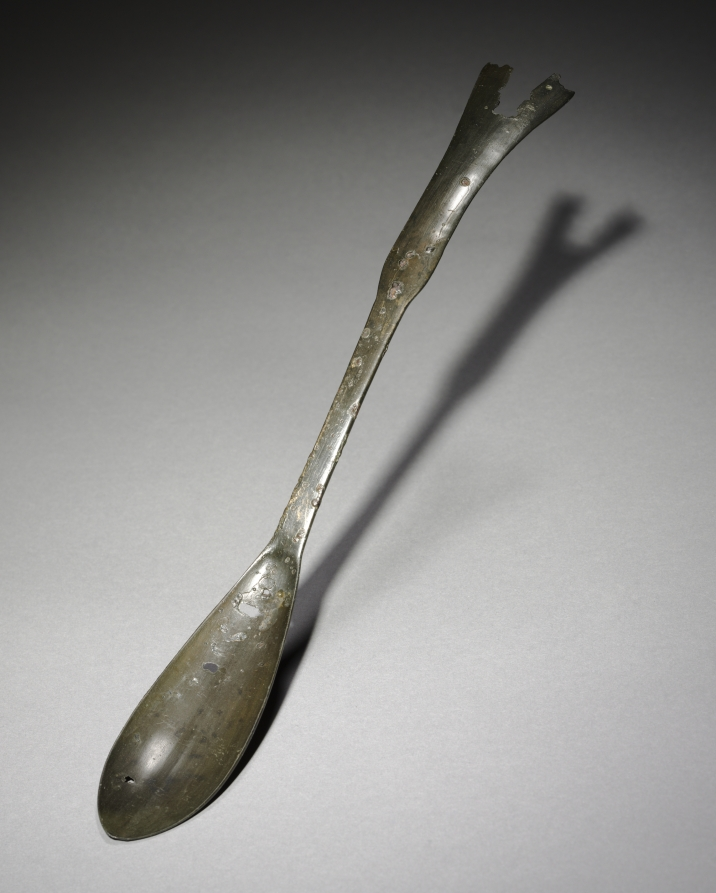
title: Spoon with Fish-Tail Design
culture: Korea, Goryeo dynasty (918–1392)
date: 918–1392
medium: silver bronze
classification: Metalwork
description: Many of Goryeo period spoons like this one feature a curved handle that splits into a jagged fishtail design. This fishtail design is not unique to Korea; it was also widely used in the area under the rule of two non-Han Chinese states: Liao (907–1125) and Jin (1115–1234). These seemingly ordinary objects testify to exciting material interactions between the Goryeo dynasty and non-Han Chinese northern states, which were often omitted from the official records.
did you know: Bronze spoons are the most common burial item. Scholars have proposed that toward the end of the 14th century, Koreans enjoyed meat-based soups more than any other dishes, explaining why spoons became common household items as well as burial goods.